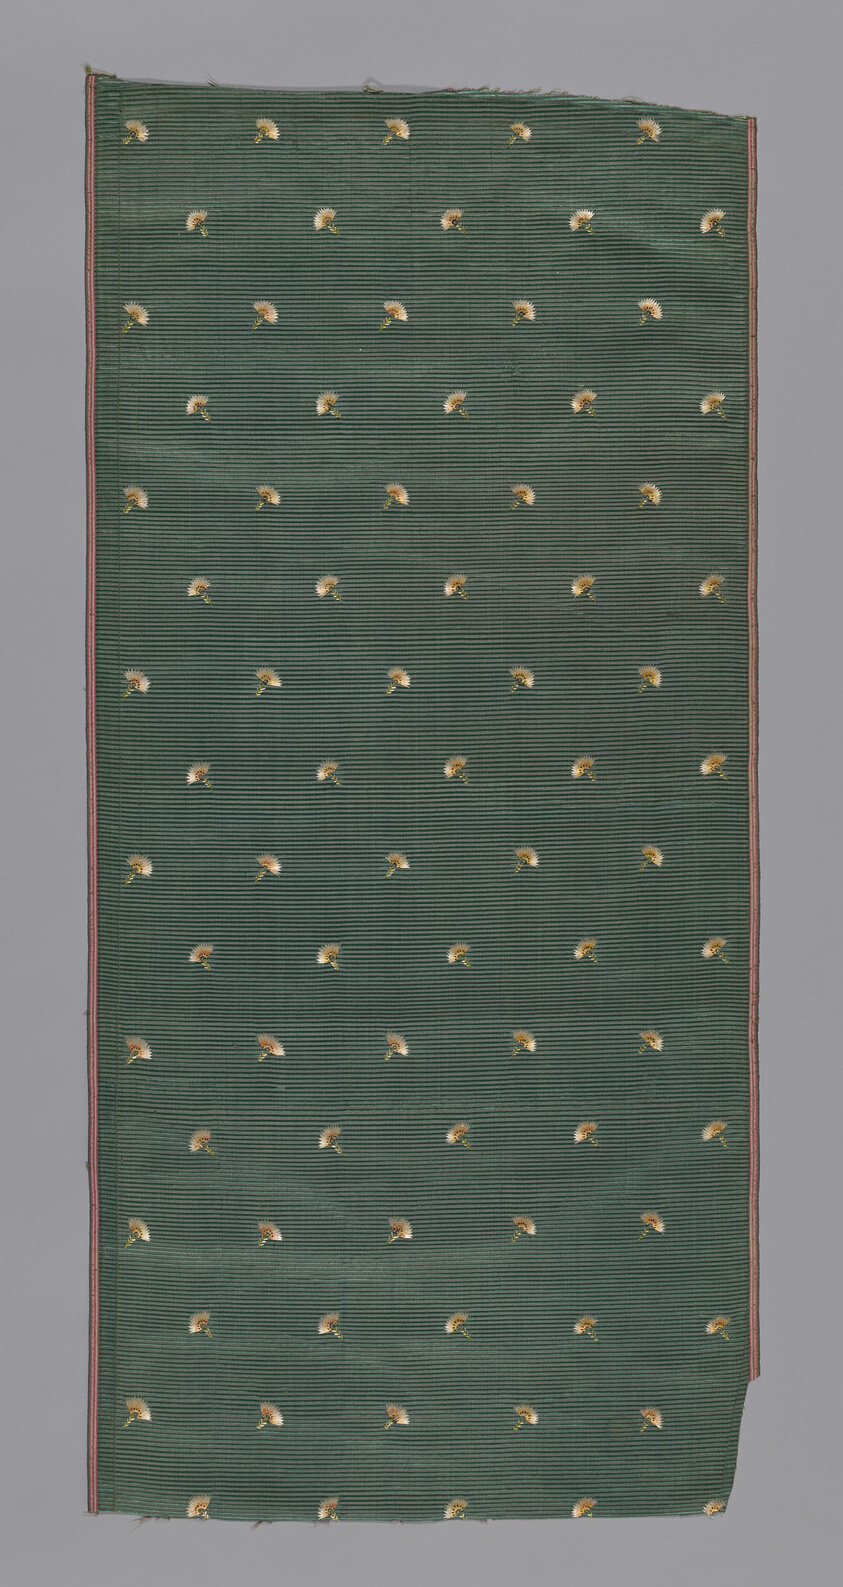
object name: Textile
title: Panel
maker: France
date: 1775/1825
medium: Silk, warp-faced plain weave, alternating with additional warp floats; embroidered in silk threads in satin stitch and French knots; paillettes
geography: France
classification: textile; embroidery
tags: fashion